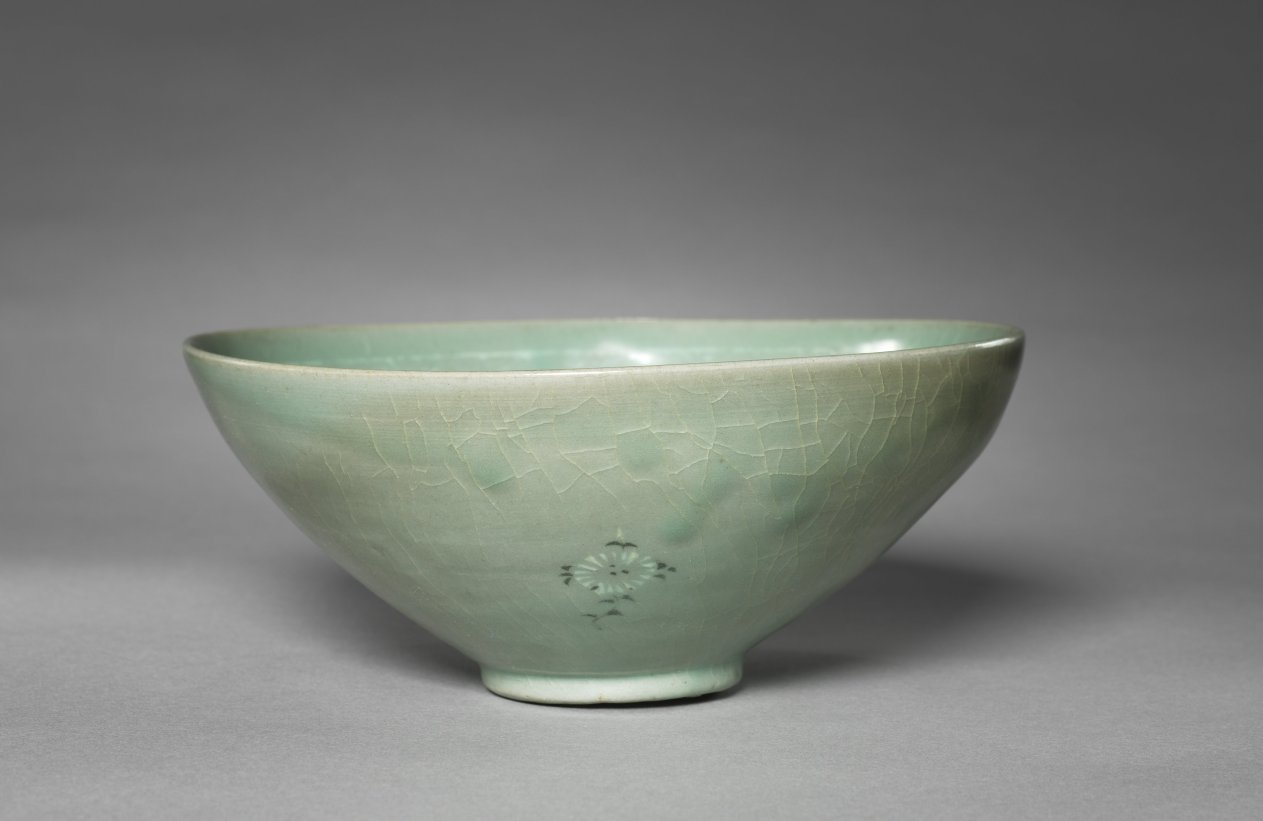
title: Bowl with Inlaid Chrysanthemum and Peony Design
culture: Korea, Goryeo dynasty (918–1392)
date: 1100s–1200s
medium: pottery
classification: Ceramic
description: As early as the seventh century, the practice of drinking tea and wine became an important part of elite leisure culture in Korea. A wide bowl like this example was especially suitable for drinking powdered tea shaved from a compressed tea cake, the most commonly enjoyed type during the Goryeo period. The inlaid image of bloomed peonies on the inner wall of this tea bowl must have made the moment of drinking tea more enjoyable.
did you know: Kangjin and Buan kilns in Jeolla province were the two major production centers for celadon wares during the Goryeo period (918–1392).